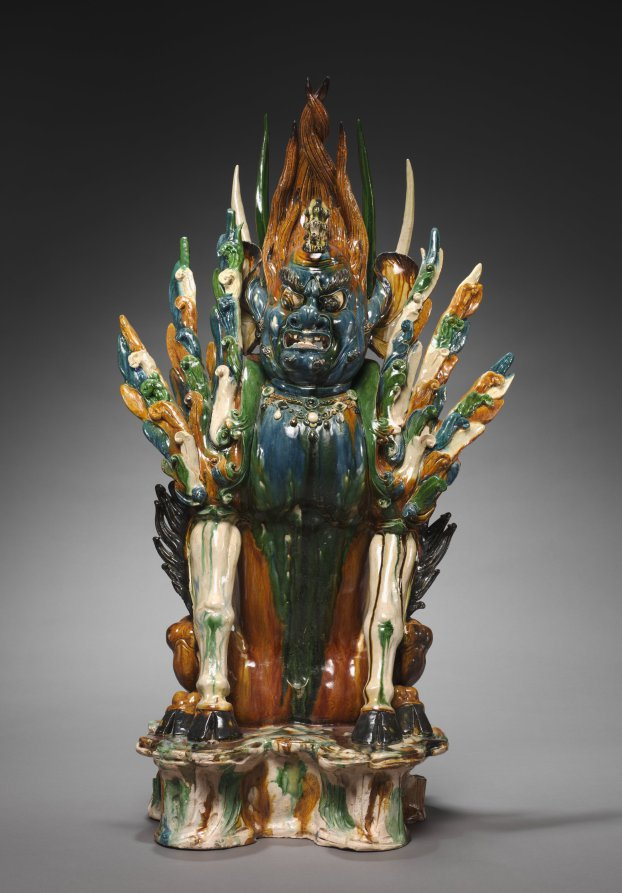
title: Tomb Guardian with Human Face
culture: China, probably Shaanxi province, Xi'an, Tang dynasty (618-907)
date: early 700s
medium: glazed earthenware, sancai (three-color) ware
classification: Ceramic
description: With their fierce expressions and exaggerated physical features, these two fantastic guardian creatures were intended to guard the entrance to a tomb, warding off evil as well as keeping the soul of the deceased from wandering. Known as "earth spirits" or qitou, this one sports a human face with huge protruding ears and a short horn surrounded by fiery, twisting hair; the other has an animal face and a pair of antlers growing above its eyebrows. Their many elongated spikes heighten the fearful intensity. Before tomb sculptures were placed in the tomb, they were carried through the streets in a funerary procession. Funerary gifts provided the deceased with means for the afterlife. They were also an expression of filial piety and demonstrated the wealth and power of the descendants.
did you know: Cobalt blue glaze used on the head and chest was imported from the Middle East.